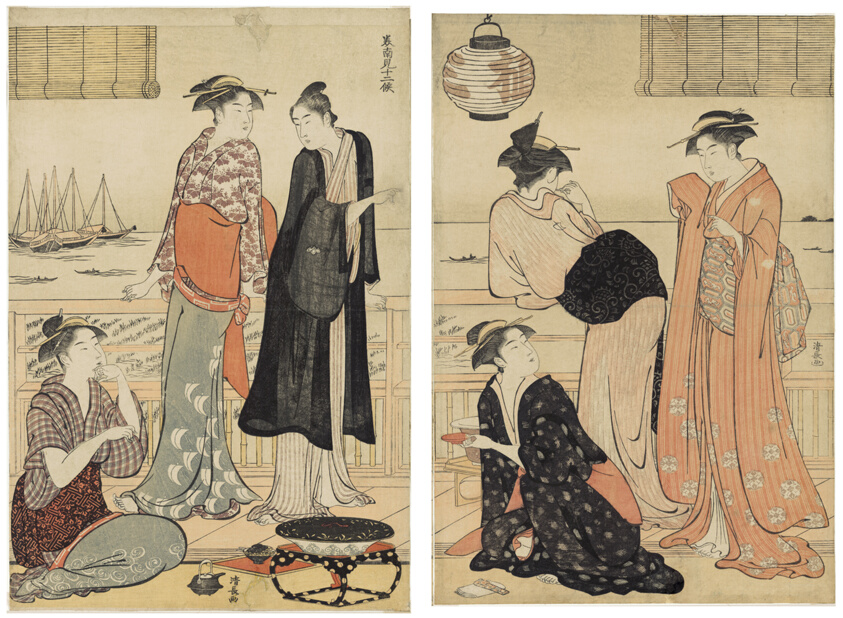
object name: Print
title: The Sixth Month, Enjoying the Evening Cool in a Teahouse, from the series The Twelve Months in the Southern Quarter (Minami jūni kō)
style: Japanese (culture or style)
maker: Torii Kiyonaga (Japanese, 1752-1815)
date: About 1783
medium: Color woodblock prints; oban diptych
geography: Japan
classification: woodblock print; print; asian art